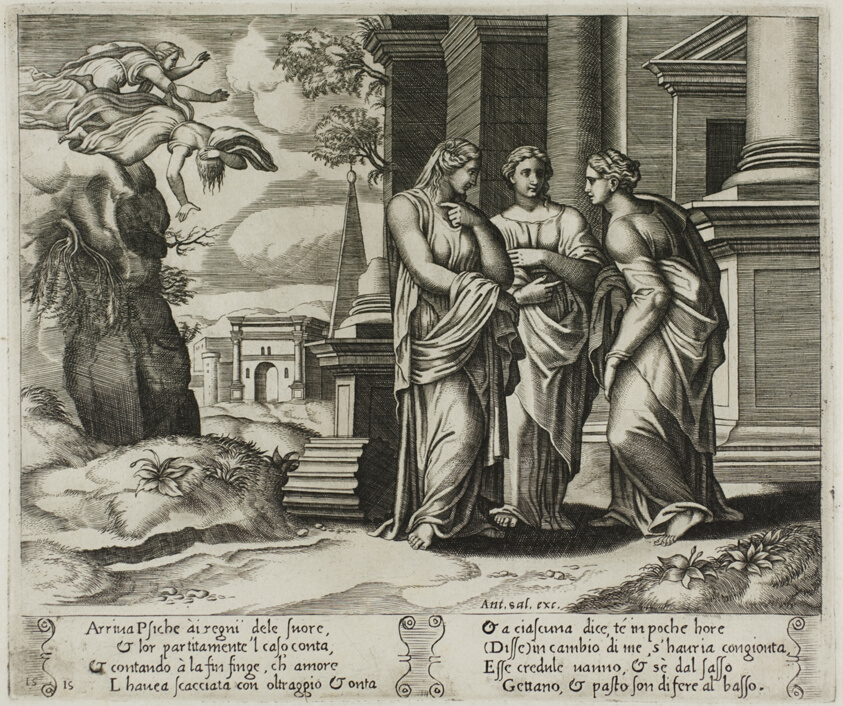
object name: Print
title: Psyche Telling Her Misfortune to Her Sisters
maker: Master of the Die (Italian, active c. 1530-1560); after Michiel Coxcie I (Flemish, 1499-1592); in turn, inspired by Raffaello Sanzio, called Raphael (Italian, 1483-1520)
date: 1530/40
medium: Engraving in warm brown ink on cream laid paper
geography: Italy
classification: engraving; print; prints and drawing